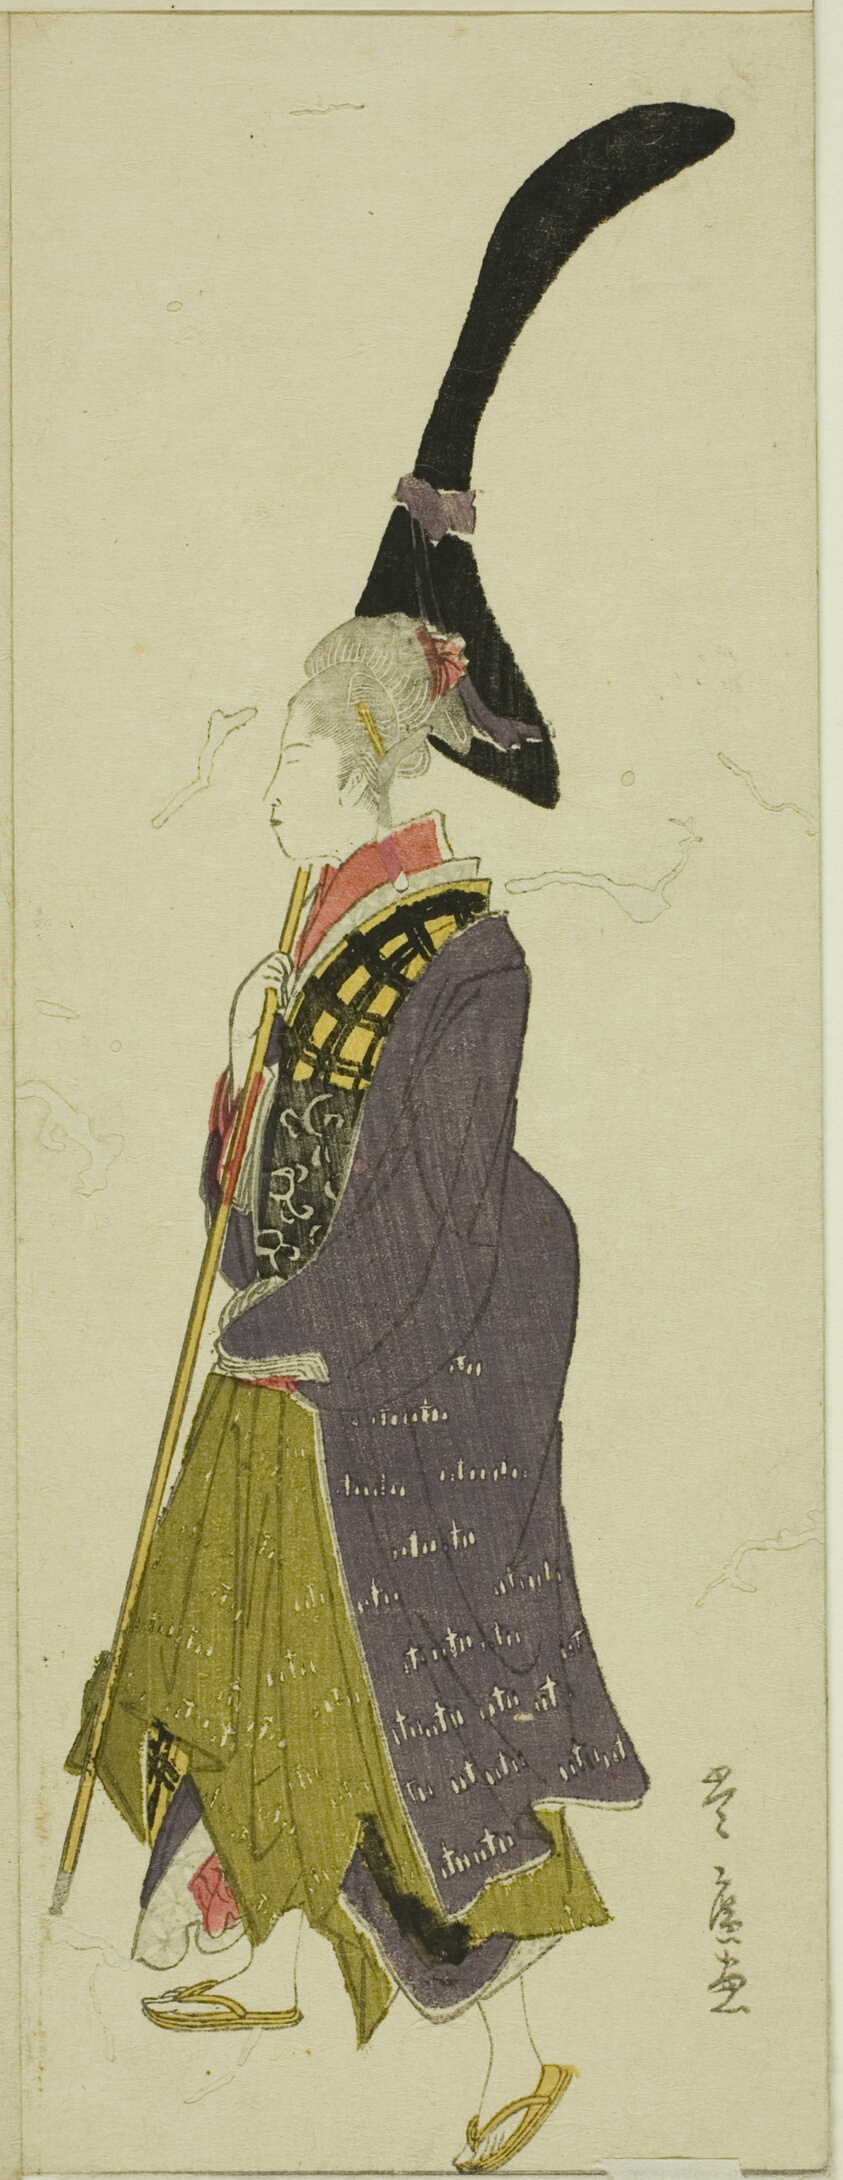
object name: Print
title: Parody of a daimyo procession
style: Japanese (culture or style)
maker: Utagawa Toyohiro (Japanese, 1773-1828)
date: c. 1805/07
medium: Color woodblock print; 1 of 12 sheets (see 1928.391-402)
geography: Japan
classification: woodblock print; print